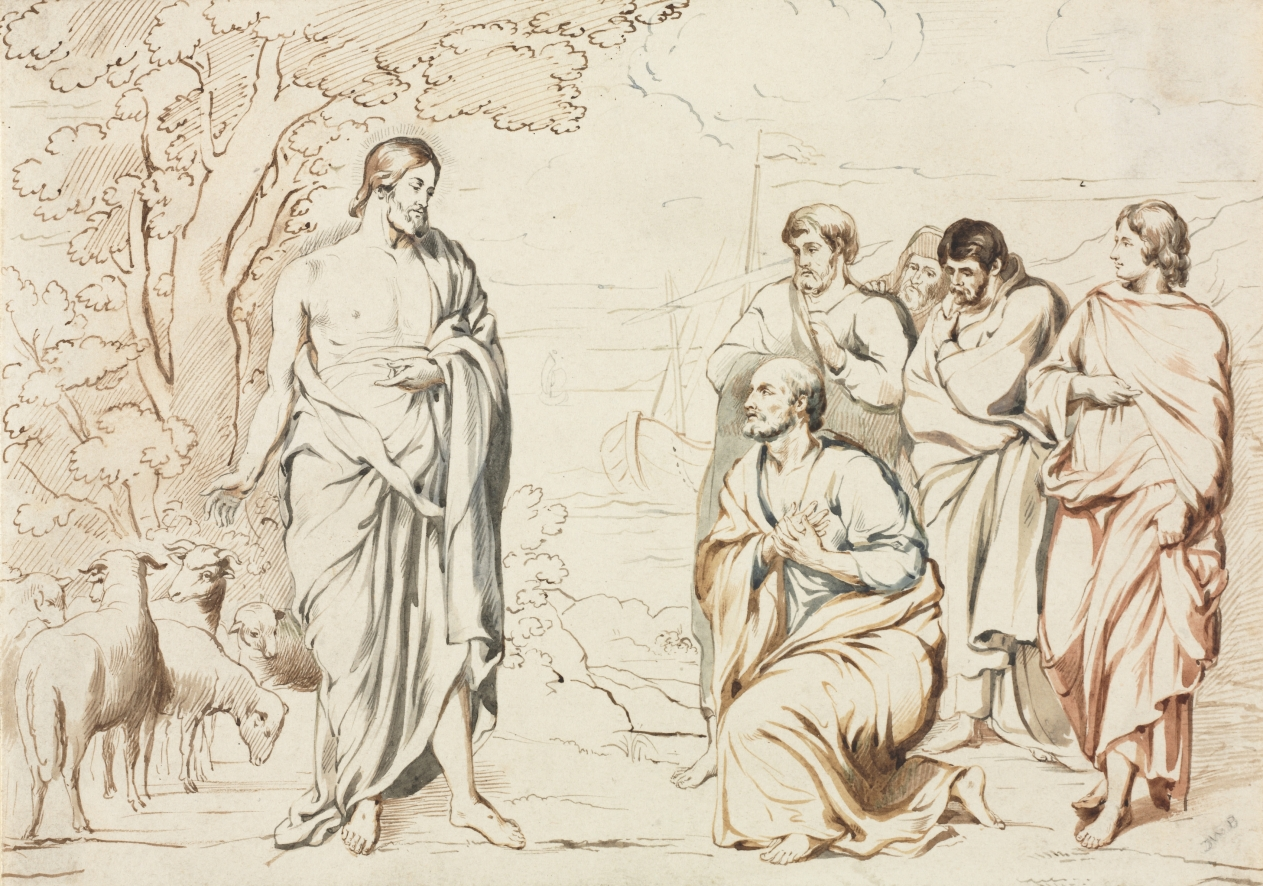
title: Christ and His Disciples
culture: England, 19th century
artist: Joseph Brett (British, 1816–1848)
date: c. 1836–48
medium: pen and colored inks with ink wash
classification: Drawing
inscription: Initialed in pencil